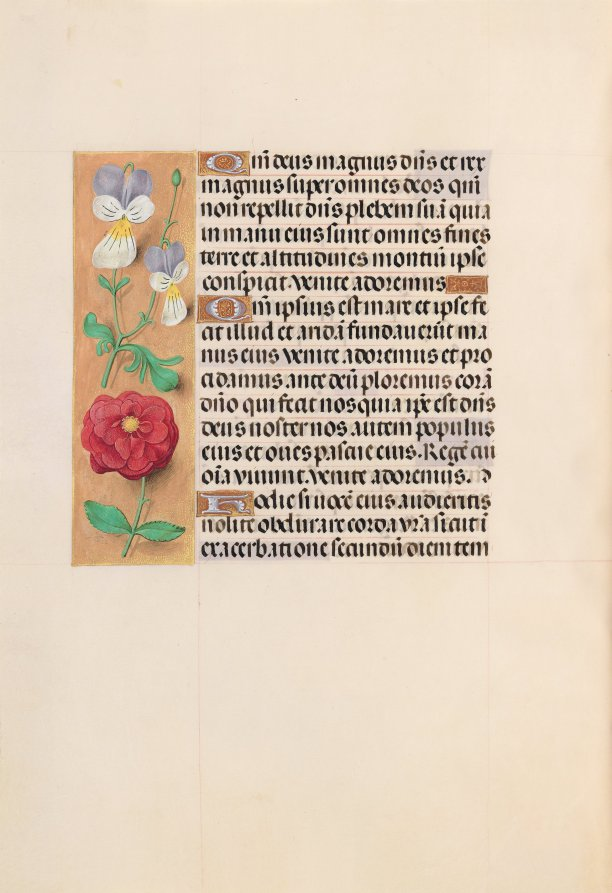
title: Hours of Queen Isabella the Catholic, Queen of Spain: Fol. 226v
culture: Flanders, Ghent and Bruges, late 15th century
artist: Master of the First Prayerbook of Maximillian (Flemish, c. 1444–1519)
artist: and Associates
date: c. 1500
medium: ink, tempera, and gold on vellum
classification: Bound Volume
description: This manuscript was illuminated by a circle of at least five highly organized manuscript painters active in the Flemish cities of Ghent and Bruges. The principal illuminator was Alexander Bening, who painted the majority of the book's miniatures. Manuscripts produced by this circle of artists are renowned for the decoration of their borders, which typically feature a rich variety of realistically-painted flowers, birds, and butterflies. This prayer book, called a book of hours, was intended not for a cleric, but for the private devotions of a lay person-in this case, Isabella the Catholic, Queen of Spain (1451-1504). Isabella's coat of arms embellishes the book's frontispiece. It is unlikely that the book was commissioned by the Queen herself; rather, she probably received it as a diplomatic gift from someone courting her patronage, perhaps Cardinal Francisco Jimenez de Cisneros. A Franciscan friar, Jimenez was dependent upon Isabella for his advancement, first to the post of Queen's confessor in 1492, and then to Archbishop of Toledo in 1495.